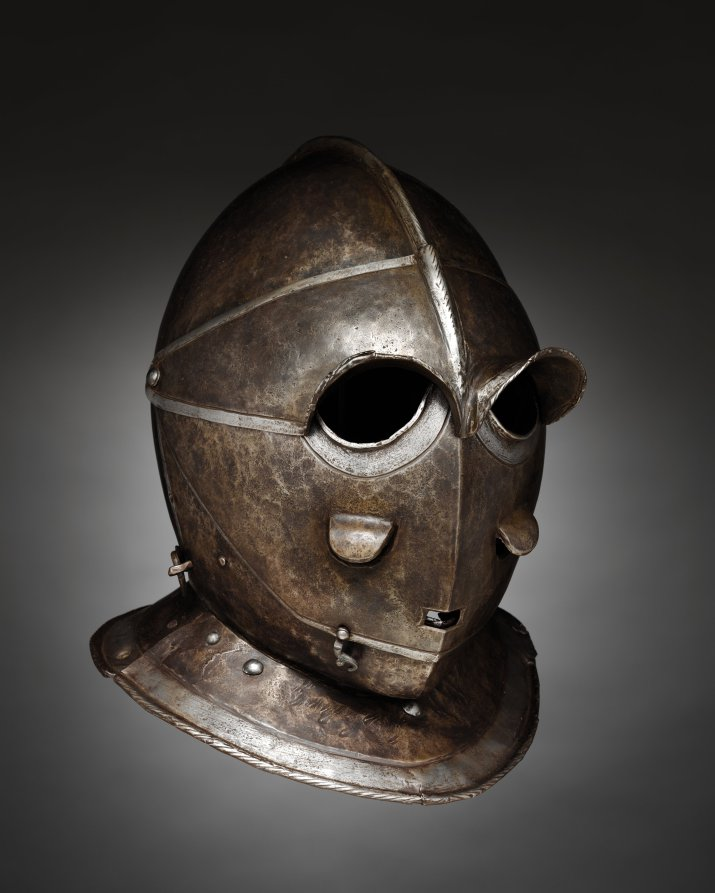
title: Savoyard Helmet (Todenkopf)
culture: Italy or Germany, early 17th century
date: c. 1600–20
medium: steel, blackened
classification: Arms and Armor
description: The term “Savoyard helmet” is used today to evoke the elite cavalry units formed by Charles Emanuel I, Duke of Savoy (1580-1630). Such helmets were designed principally to withstand and protect the wearer from shot from the powerful wheel-lock guns of the day, though their secondary function was to intimidate and terrify. The design of the helmet suggests a human face or skull. They were known as todenkopf or “death’s head” helmets in Germany. The helmet would have originally been associated with a three-quarter cuirassier armor. Similar armors are displayed nearby.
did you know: This type of helmet is also called a "todenkopf," translating to "death's head."